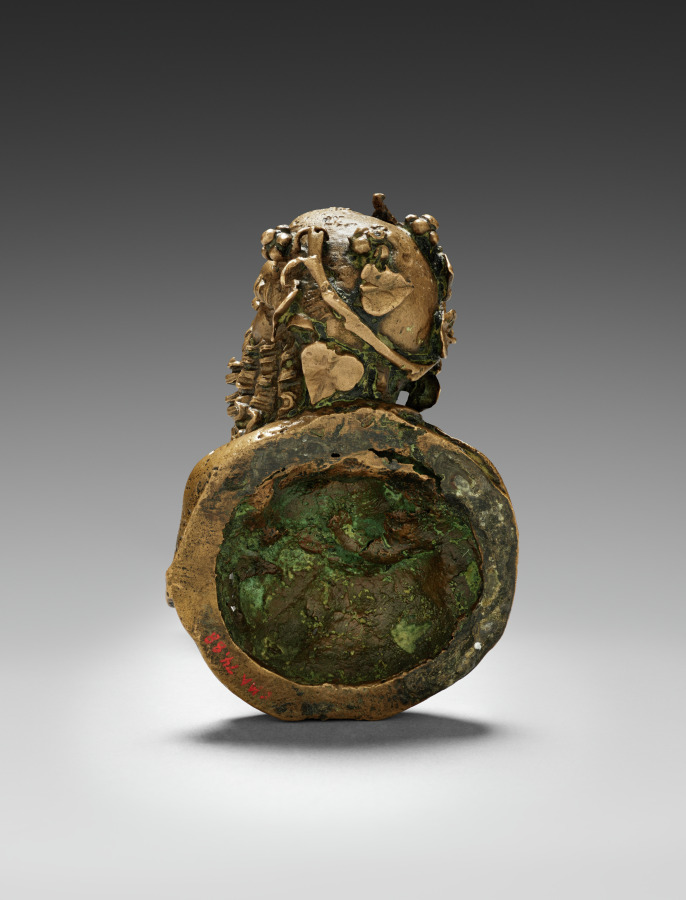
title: Silenus Bust for a Couch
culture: Italy, Roman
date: 1–125 CE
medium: bronze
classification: Sculpture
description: This bust of Silenus was part of the fulcrum or armrest of an ancient Roman couch. Silenus was the tutor and companion of Bacchus, the Roman god of wine. He is shown with a long curly beard, bushy eyebrows, and wearing a garland of ivy vines with berries. His deerskin robe, tied by the animal’s hoof, falls off his shoulder, suggesting drunkenness. The bust would have been placed at the base of the armrest where it met the seat of the couch, while an animal head likely decorated the top. As is the case with many Roman objects, Romans adapted their couch style and decoration from the Greeks.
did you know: This silenus’s beard is made up of exactly ten ringlets of curls.